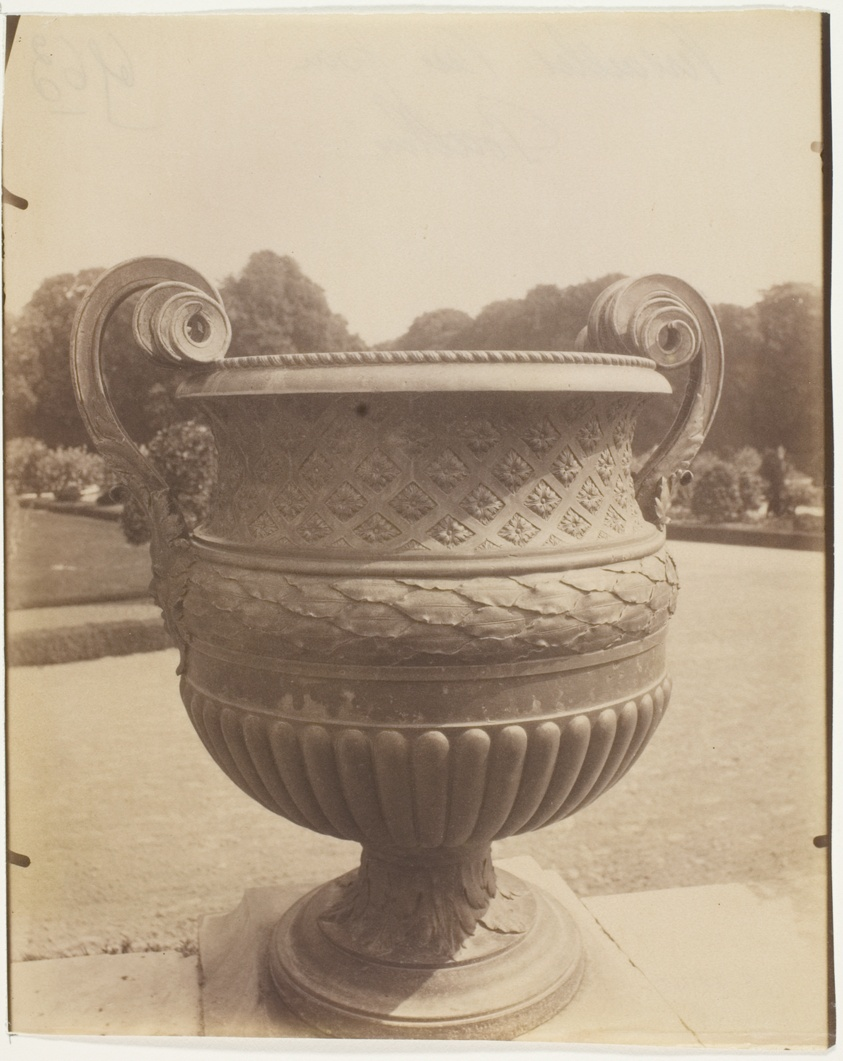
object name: Photograph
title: Versailles, Vase par Ballin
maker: Jean-Eugène-Auguste Atget (French, 1857–1927)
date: 1905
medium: Albumen print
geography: France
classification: albumen silver print; photographic process; photography; photograph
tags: Collected by Hugh Edwards